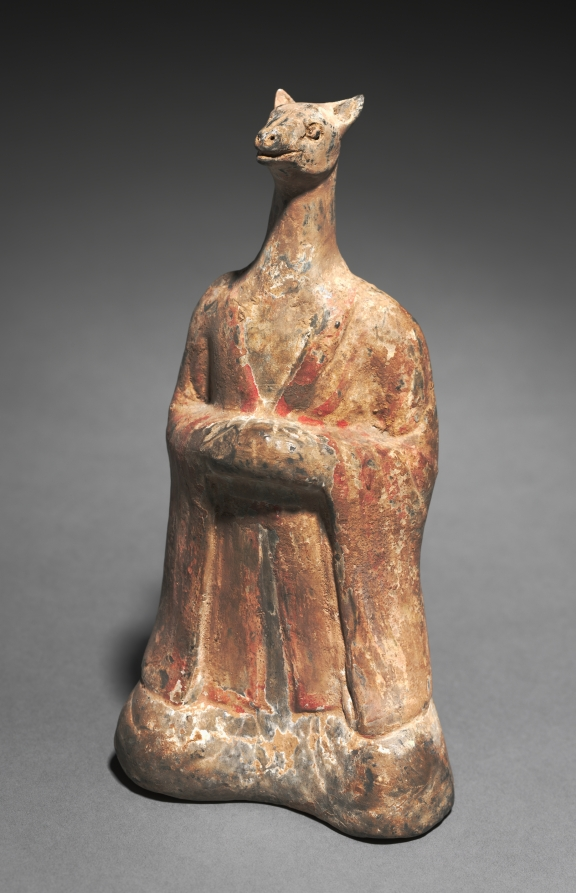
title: Mortuary Figure of the Zodiac Sign: Dog (Aquarius)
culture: China, Northern Wei dynasty (386-534)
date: 500s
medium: gray earthenware with traces of slip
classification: Sculpture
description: The twelve-animal zodiac series—rat, ox, tiger, rabbit, dragon, snake, horse, goat, monkey, rooster, dog, and boar—signifies a traditional Chinese concept of time structured in a cyclical order. The twelve animals are also linked to the art of fortune-telling that underlies human existence in connection with the changes of the universe. The use of the twelve zodiac animals as tomb furniture suggests they provided a cosmological structure for the afterlife.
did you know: This set of mortuary figures was donated by the first woman president of the Cleveland Museum of Art's board of trustees, Emery May Holden Norweb.